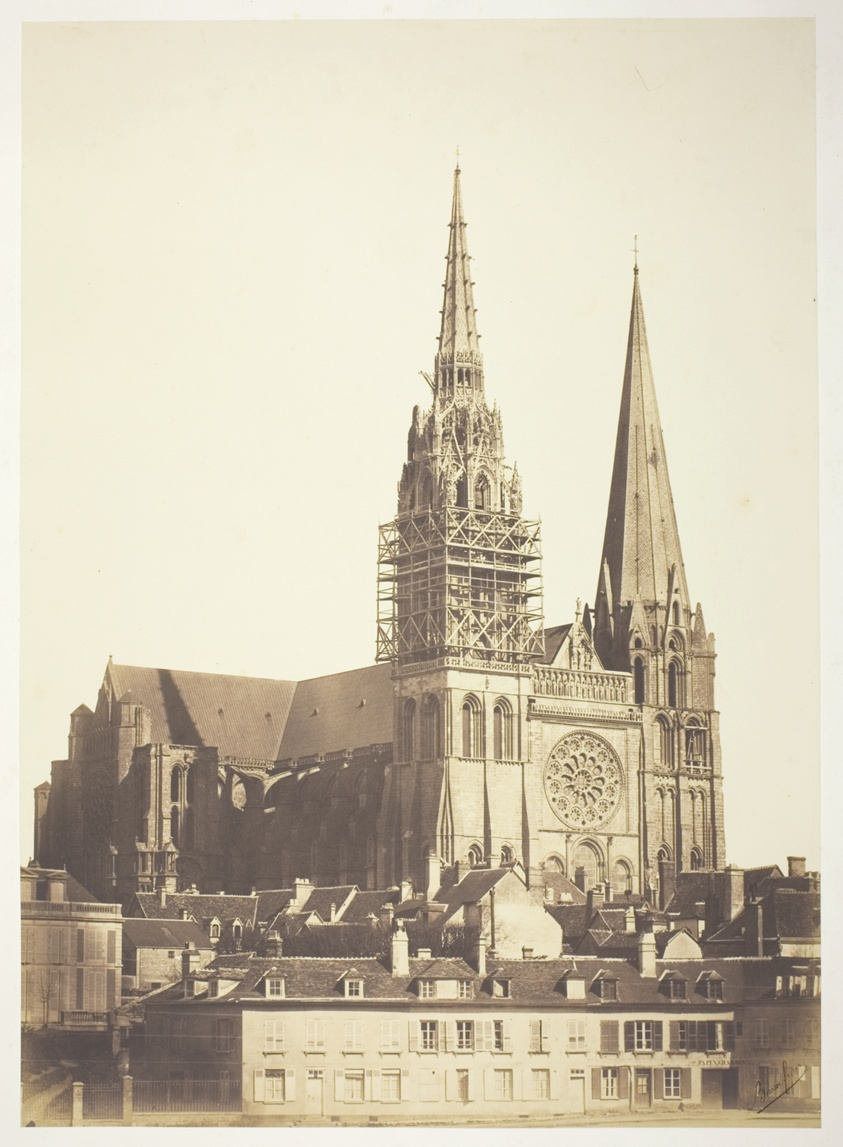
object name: Photograph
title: Chartres Cathedral, West Facade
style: 19th century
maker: Bisson Frères (Louis-Auguste Bisson, French, 1814–1876 and; Auguste-Rosalie Bisson, French, 1826–1900)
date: 1854, printed 1854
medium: Albumen print, from the album "Reproductions photographiques des plus beaux types d’architecture et de sculpture"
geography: France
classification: albumen silver print; photographic process; photography; photograph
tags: Collected by Hugh Edwards, architecture, Paris